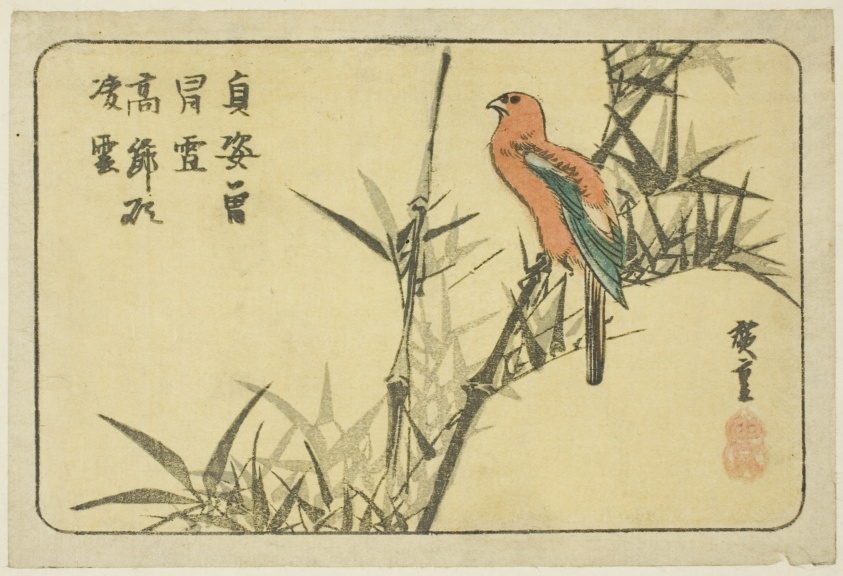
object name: Print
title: Macaw and bamboo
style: Japanese (culture or style)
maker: Utagawa Hiroshige 歌川 広重; Japanese, 1797-1858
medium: Color woodblock print; yotsugiriban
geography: Japan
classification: woodblock print; print; asian art